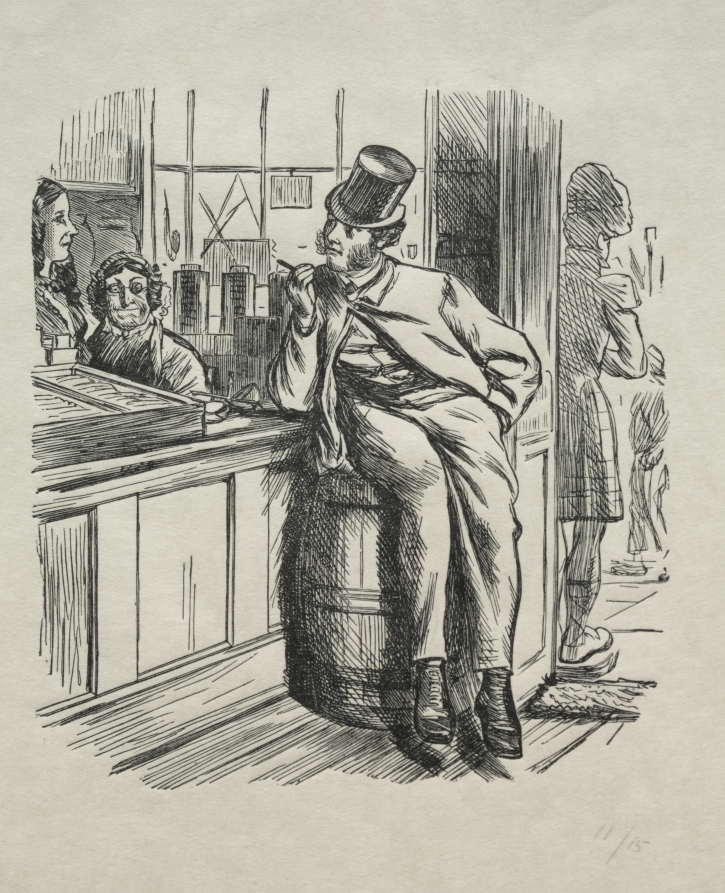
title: What Came of Killing a Rich Uncle One Christmas Time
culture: England, 19th century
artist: Horace Harral (British, 1817–1905)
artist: after Charles Samuel Keene (British, 1823–1891)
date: 1865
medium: wood engraving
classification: Print